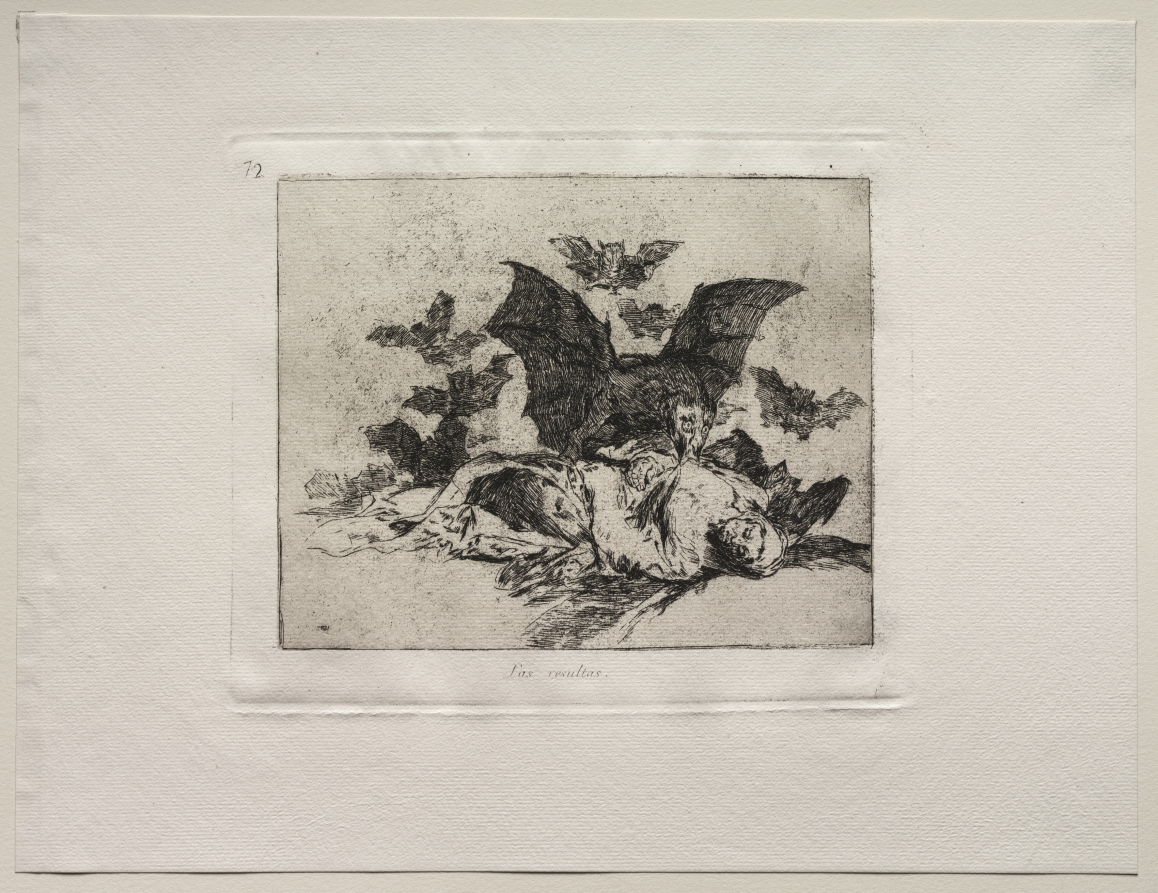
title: The Horrors of War: The Consequences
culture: Spain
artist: Francisco de Goya (Spanish, 1746–1828)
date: c. 1810–20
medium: etching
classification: Print